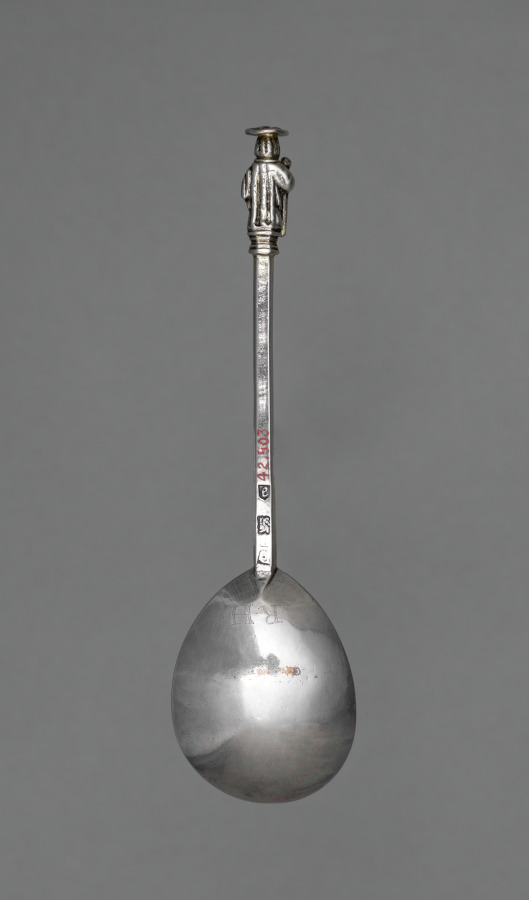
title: Apostle Spoon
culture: England, London, 17th century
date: 1622–1623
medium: silver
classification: Silver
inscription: "RH" on back of bowl.